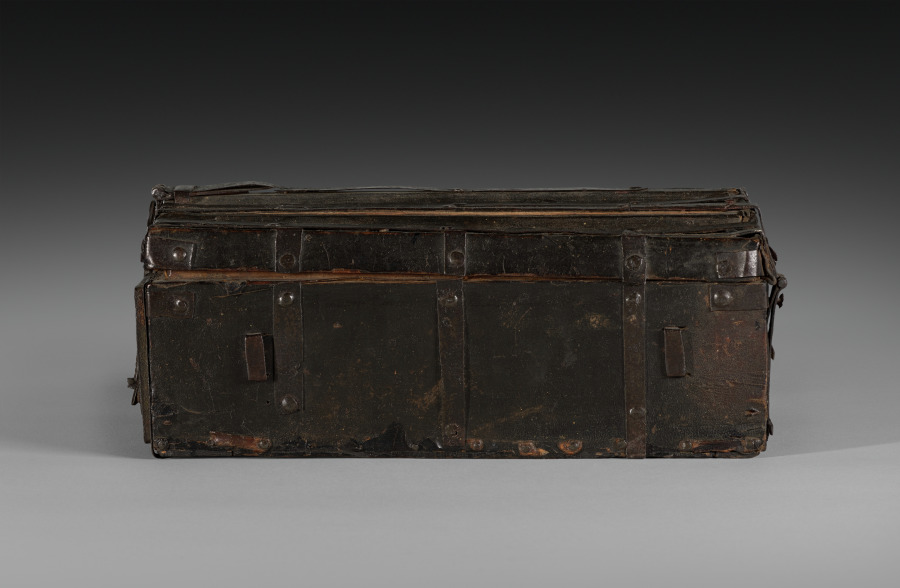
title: Coffret with Woodcut of Saint Veronica's Vernicle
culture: Coffret: France, probably Paris; Woodcut: Germany, Augsburg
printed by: Hans Burgkmair the Elder (German, 1473–1531)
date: Coffret: c. 1515; Woodcut: c. 1509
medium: Wood, leather, iron, textile, woodcut with stenciled coloring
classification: Print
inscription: SALVE. XPI. EFFIGIES. SACERRI[M]A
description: This remarkable object is thought to have functioned as a traveling case to keep small valuables and books, as well as a provisional altar. Made in France around 1515, the interior lid is affixed with a devotional woodcut made in Germany, imported, and colored for the purpose. Featuring an image of the veil of Saint Veronica, the text at the bottom of the woodcut guides the user in prayer to the holy image of Christ’s face which has been miraculously imprinted on the veil, an action that held promise of indulgences (a reduction in one’s punishment for sins). Presumably, the owner carried the box on a journey, retrieved a prayer book from inside, and propped it open in order to practice daily prayers.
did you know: A secret compartment on the top lid of this coffer may have held a relic, consecrated host, or valuable document.